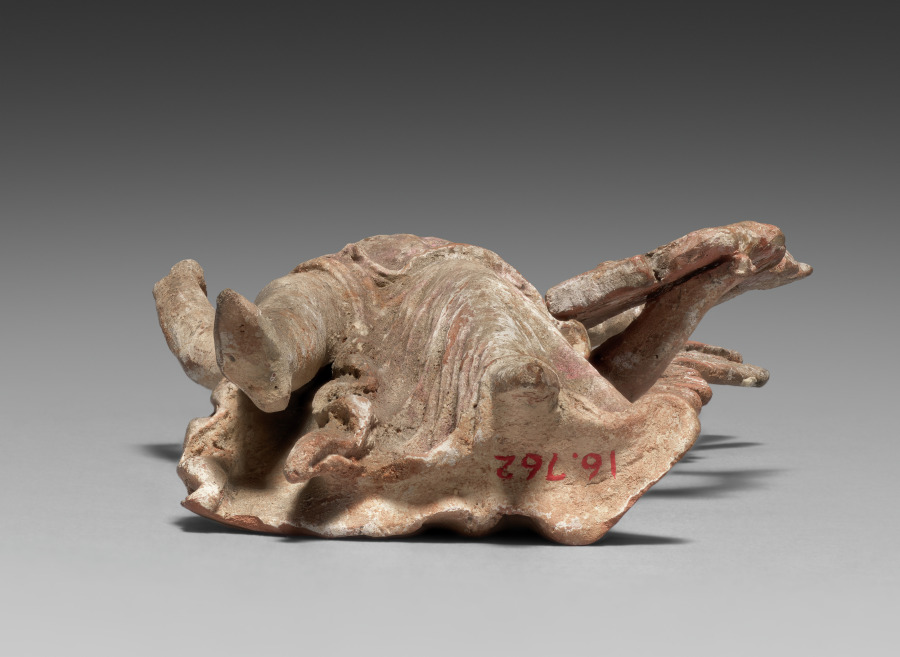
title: Figurine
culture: Greece, Myrina, Hellenistic period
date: 300–100 BCE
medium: terracotta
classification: Sculpture